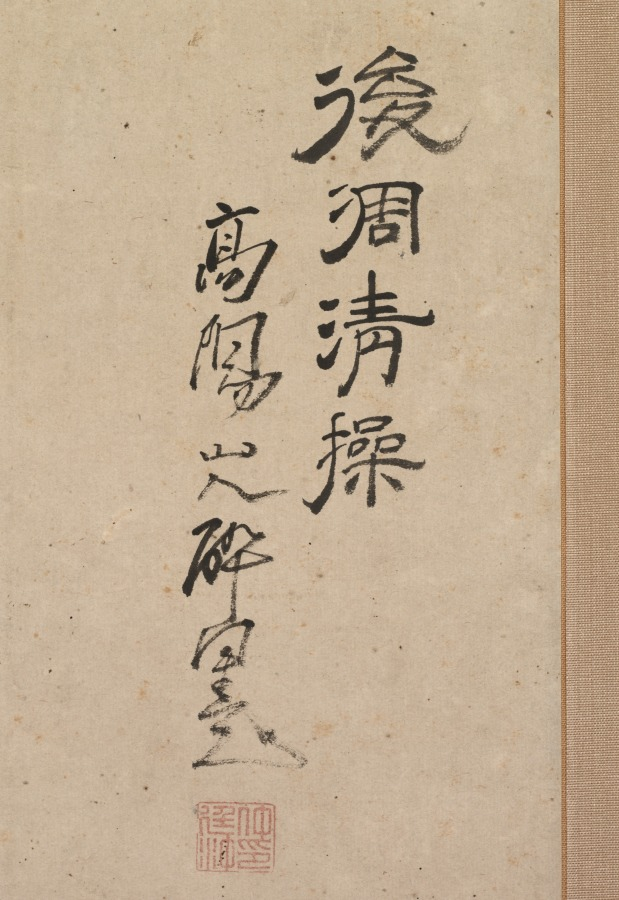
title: Aged Pine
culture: Japan, Edo period (1615–1868)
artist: Nakayama Kōyō (Japanese, 1717–1780)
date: 1717–80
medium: hanging scroll; ink on paper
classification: Painting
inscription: Artist's inscription and seal, lower right.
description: The ancient pine is an admired subject in Asian painting and symbolizes the desirable human qualities of wisdom and solid moral character.